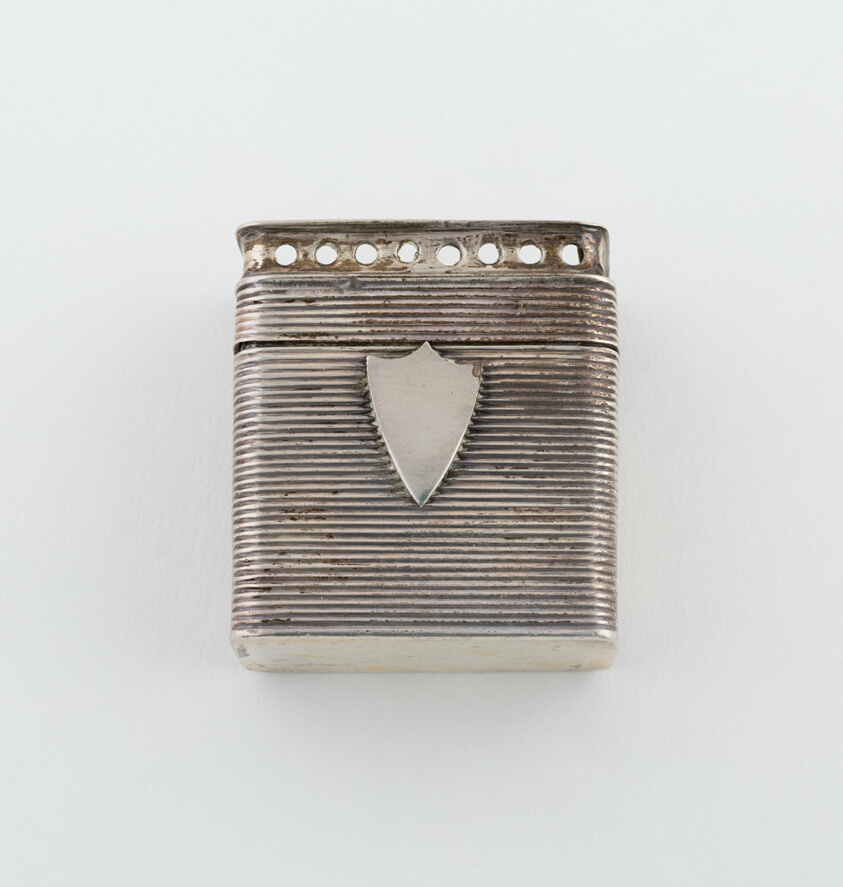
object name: Metalwork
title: Sponge Box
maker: Probably Pieter Kuijlenburg; Dutch, active c. 1818-c. 1834; Probably Schoonhoven, Netherlands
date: 1833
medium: Silver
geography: Netherlands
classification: container for personal use; box; european decorative arts; metalwork; silver; decorative object/ornament